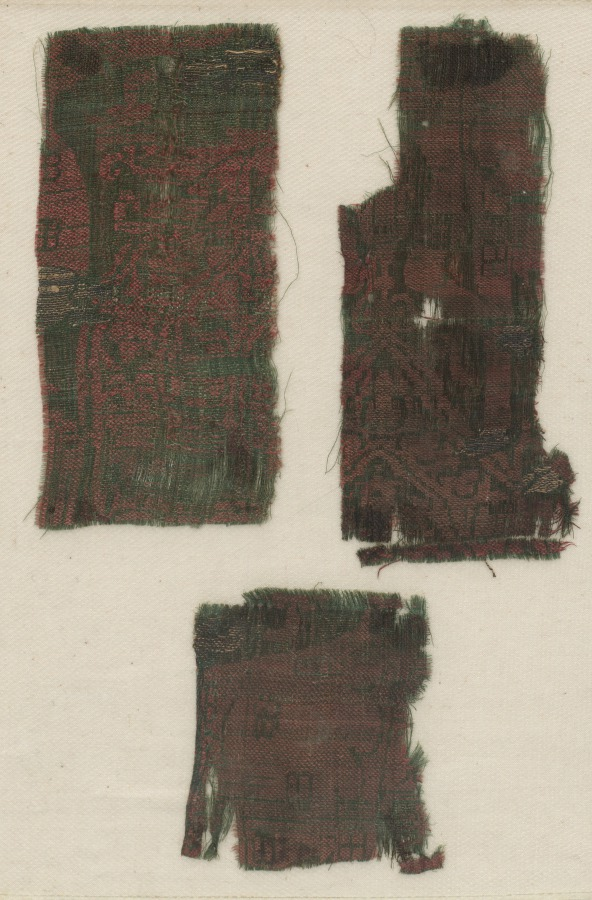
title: Three Fragments of Italian Gothic Silk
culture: Italy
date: 1300s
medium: lampas weave, brocaded; silk and gold thread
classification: Textile